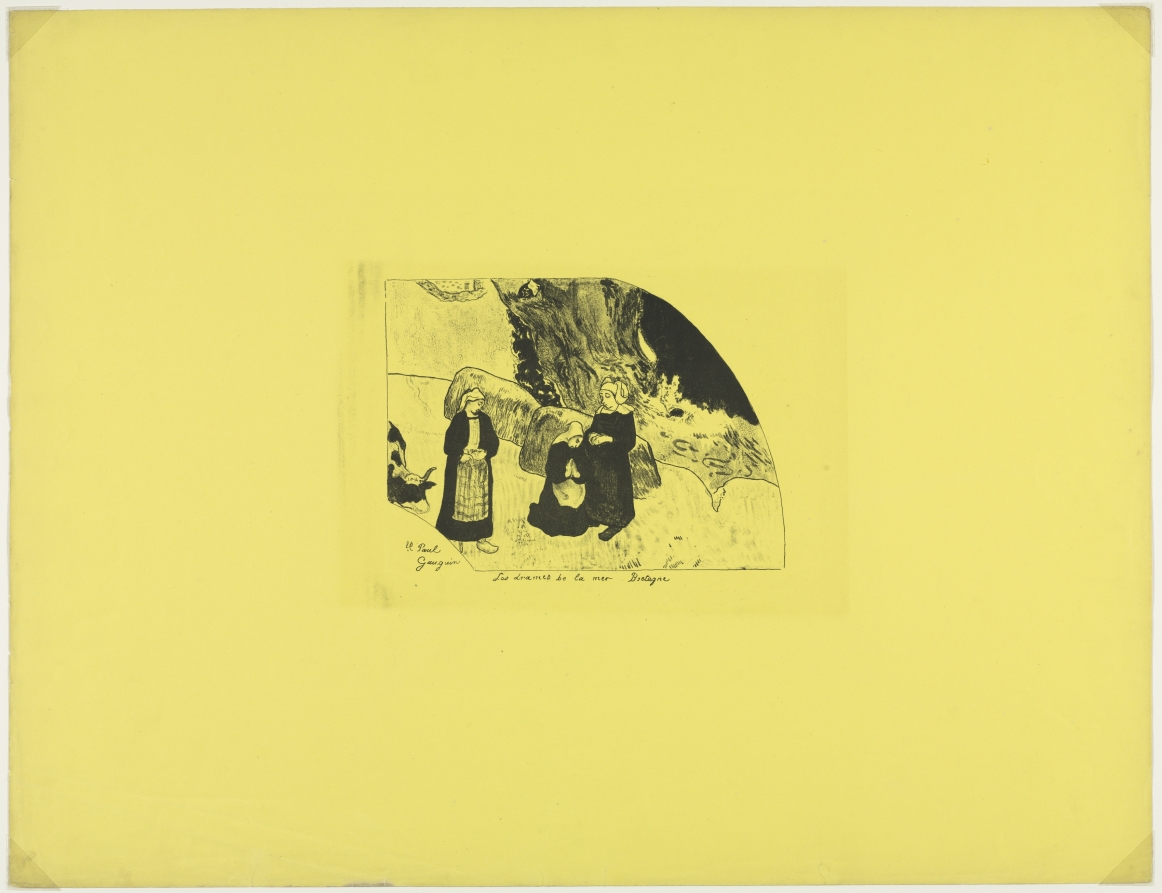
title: Volpini Suite: Dramas of the Sea: Brittany (Les Drames de la Mer, Bretagne)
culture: France, 19th century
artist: Paul Gauguin (French, 1848–1903)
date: 1889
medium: zincograph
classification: Print